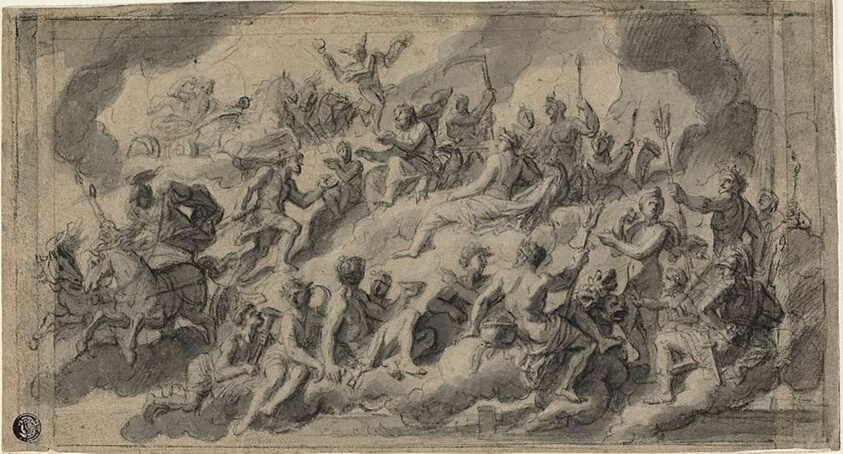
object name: Drawing and Watercolor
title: Gods on Olympus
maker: François Verdier (French, 1651-1730)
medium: Black chalk, brush and gray wash, on tan laid paper, pieced together and laid down on ivory laid paper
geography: France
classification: ink or chalk wash; drawings (visual works); prints and drawing